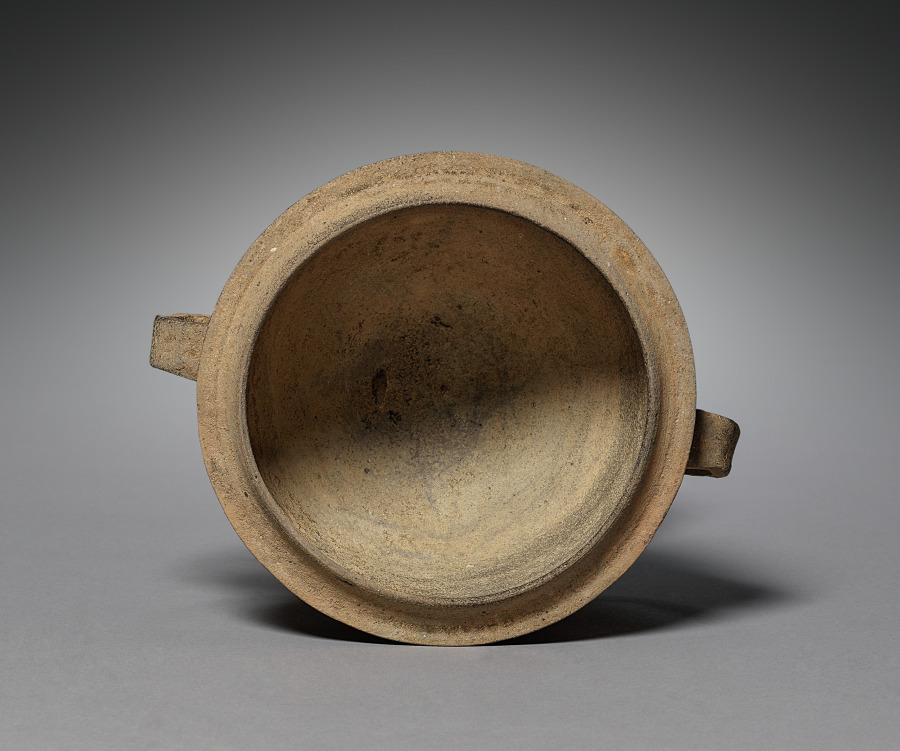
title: Lidded Cup with Strap Handles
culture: Korea, Gaya period (42–562 CE)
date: 300s–400s CE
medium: stoneware with natural ash glaze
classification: Ceramic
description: Pottery vessels with a footed stand such as this one is the earliest known high-fired ware. Its gray color is the result of the reduction of oxygen in the closed kiln chamber. Footed vessels were not for everyday usage, but rather served to present offerings to the deceased.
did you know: A series of triangular cutouts shown on the bottom are standard features of Kaya pottery.